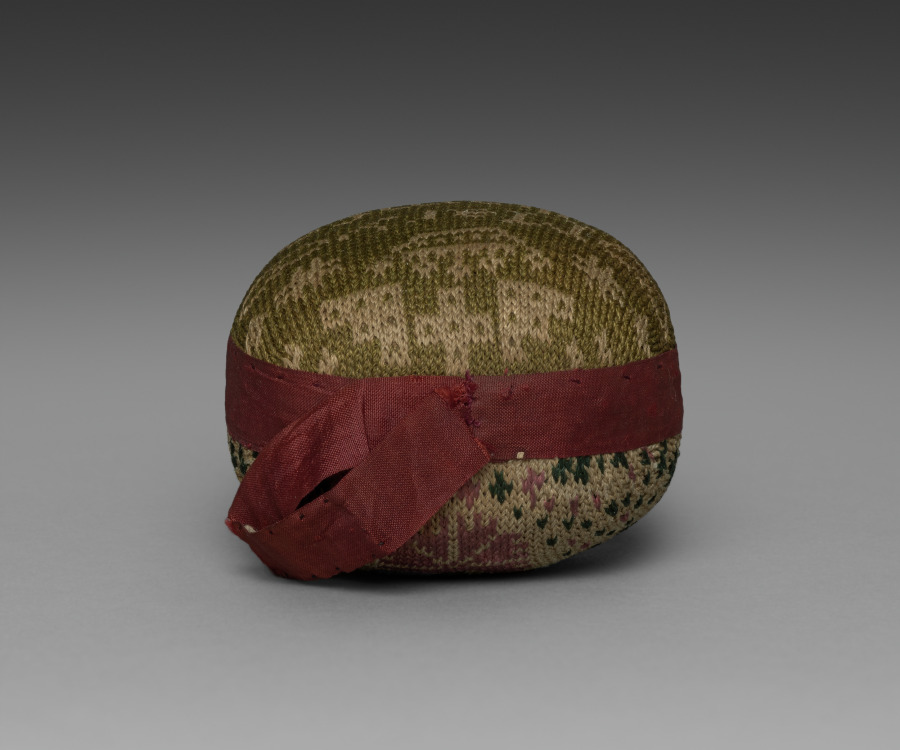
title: Pin Cushion Sampler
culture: England, 19th century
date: 1809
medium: Silk, knitted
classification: Sampler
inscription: "MARY WILLIAMSON 1809."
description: There is an inscription knit into this pin cushion, with the name Mary Williamson and the date 1809.